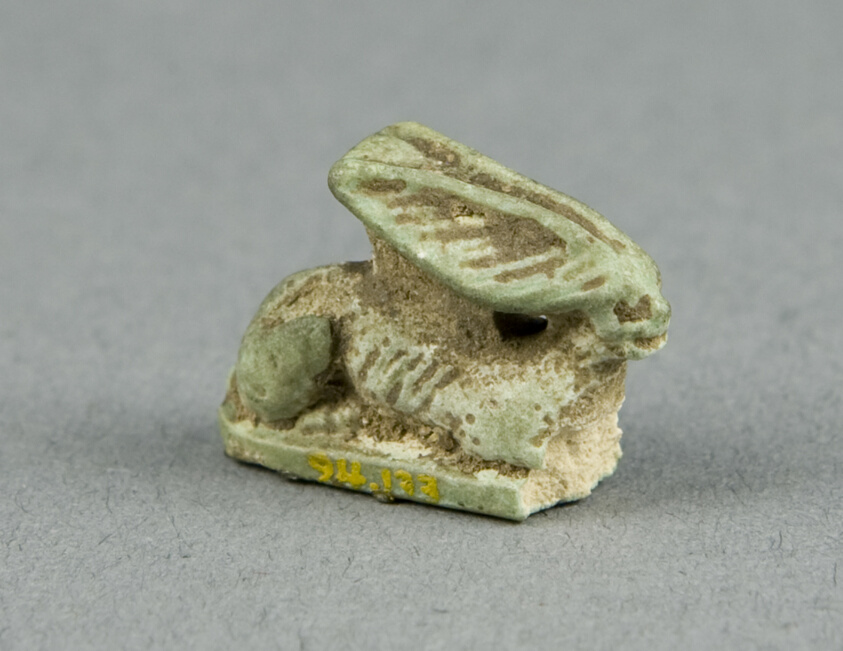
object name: Costume and Accessories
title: Amulet of a Cape Hare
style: late period (egyptian), ancient, egyptian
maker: Egyptian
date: Late Period, Dynasties 26–31 (664–332 BCE)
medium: Faience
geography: Egypt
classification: amulet; jewelry; ceramics; ancient art; costume; faïence (composite material)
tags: hares, animals